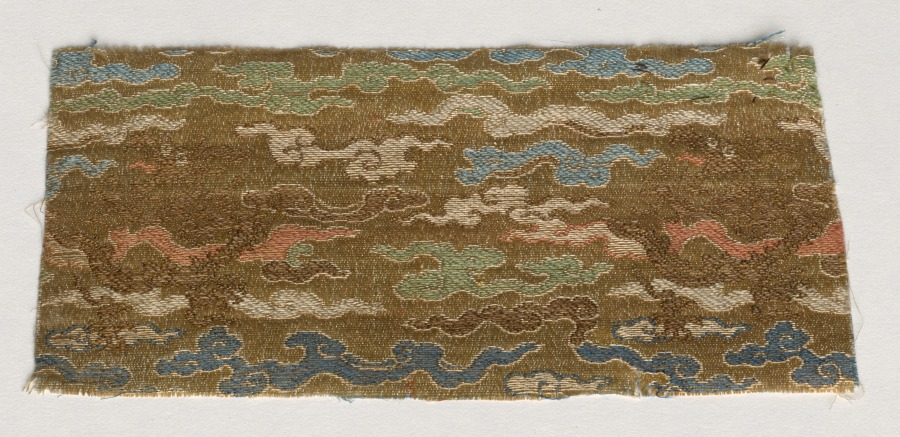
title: Fragment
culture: China, 18th century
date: 1700s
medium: satin ground; silk diasper weave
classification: Textile